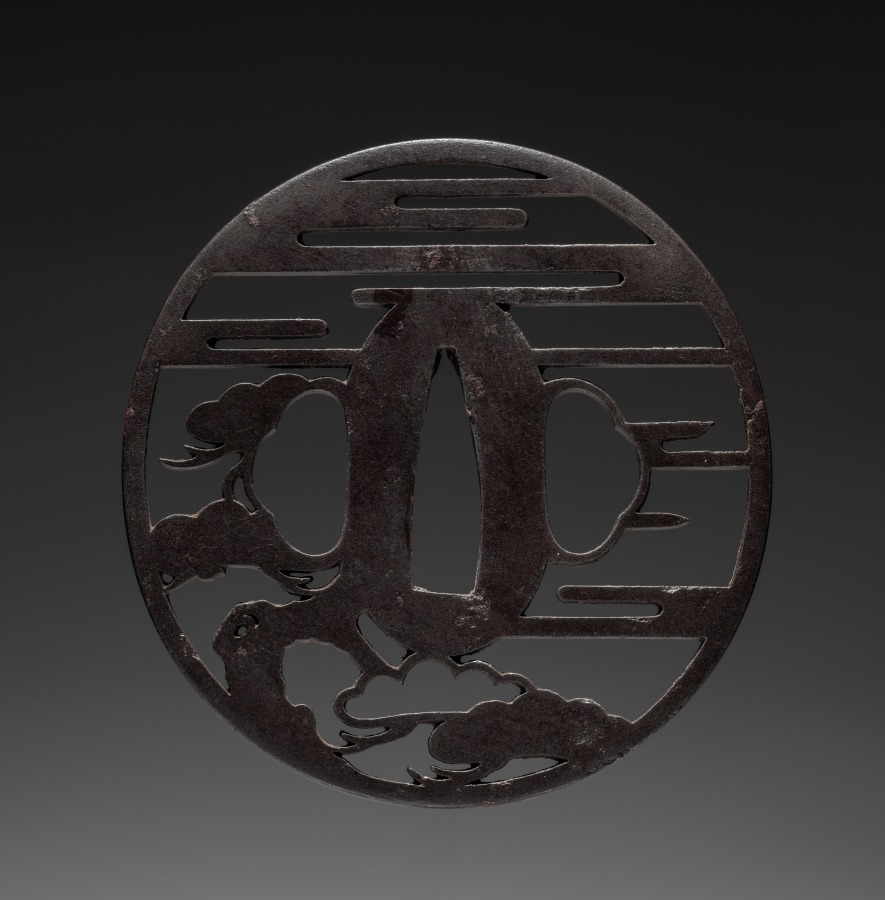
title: Sword Guard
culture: Japan, Edo period (1615–1868)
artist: Masakata (Japanese)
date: early 1800s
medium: iron (Ito type)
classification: Arms and Armor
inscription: Signature: Masakata, residing in Musashi province